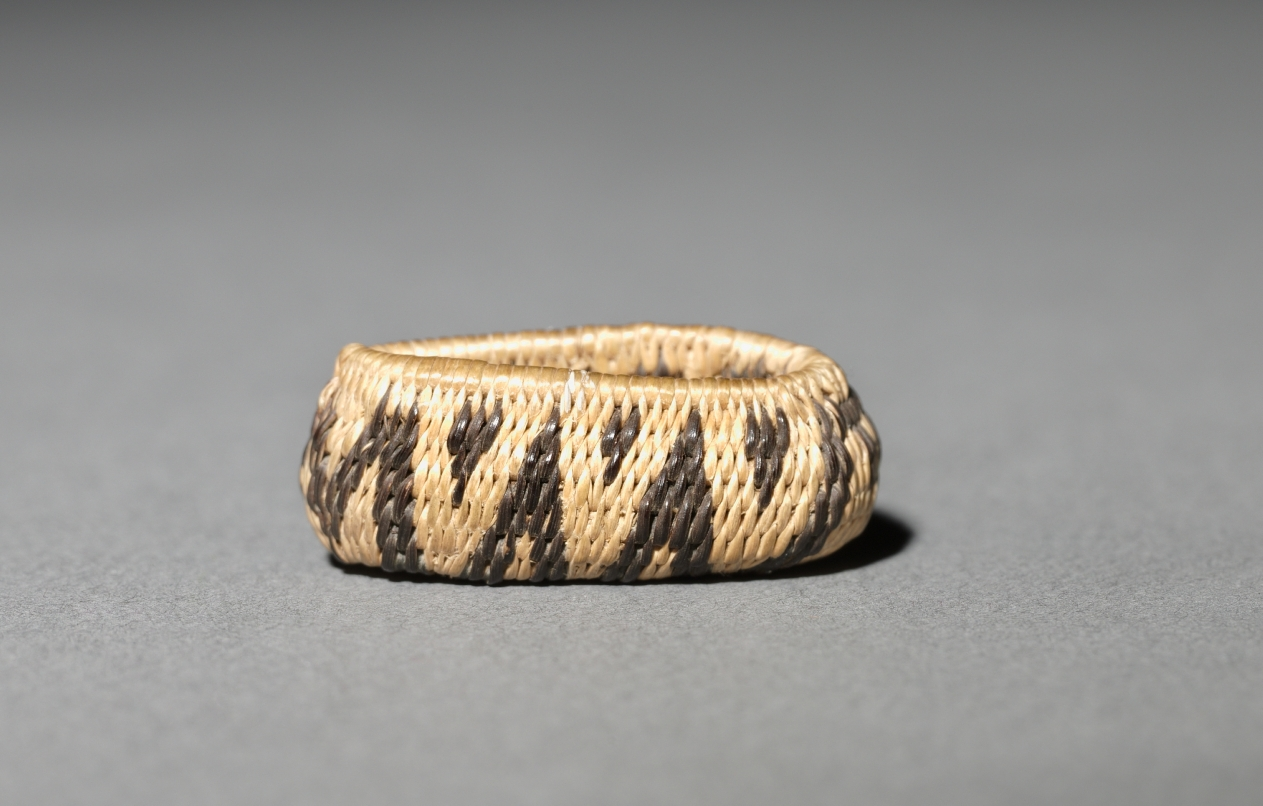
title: Miniature Oval Basket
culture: California, Pomo, late 19th-early 20th century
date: late 1800s-early 1900s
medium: plant materials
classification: Basketry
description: Miniature baskets were made to demonstrate the basket-maker’s virtuoso skill, and these tiny marvels seem to be no exception—the smallest are just a few millimeters wide but still patterned. For such fine work, dexterity was required as much for preparation of materials as for weaving.